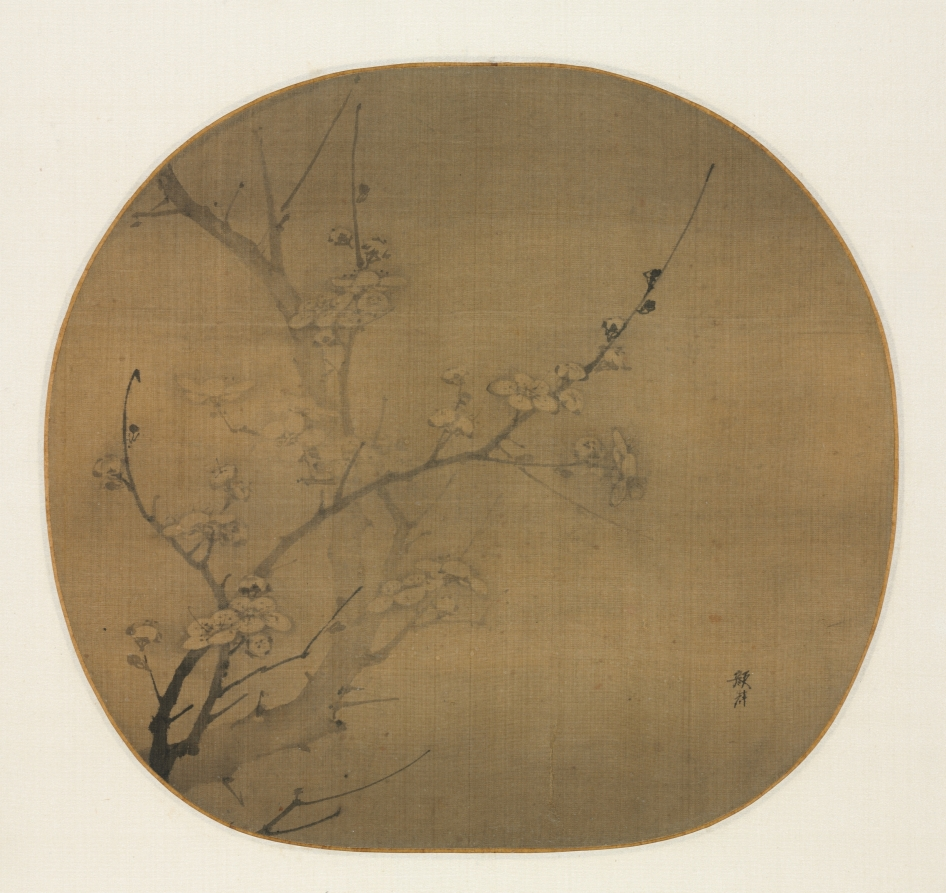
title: Plum Blossoms in Moonlight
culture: China, Yuan dynasty (1271-1368)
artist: Yan Hui (Chinese, active 1270–1310)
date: first half of the 1300s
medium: album leaf, ink on silk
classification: Painting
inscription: 顏輝